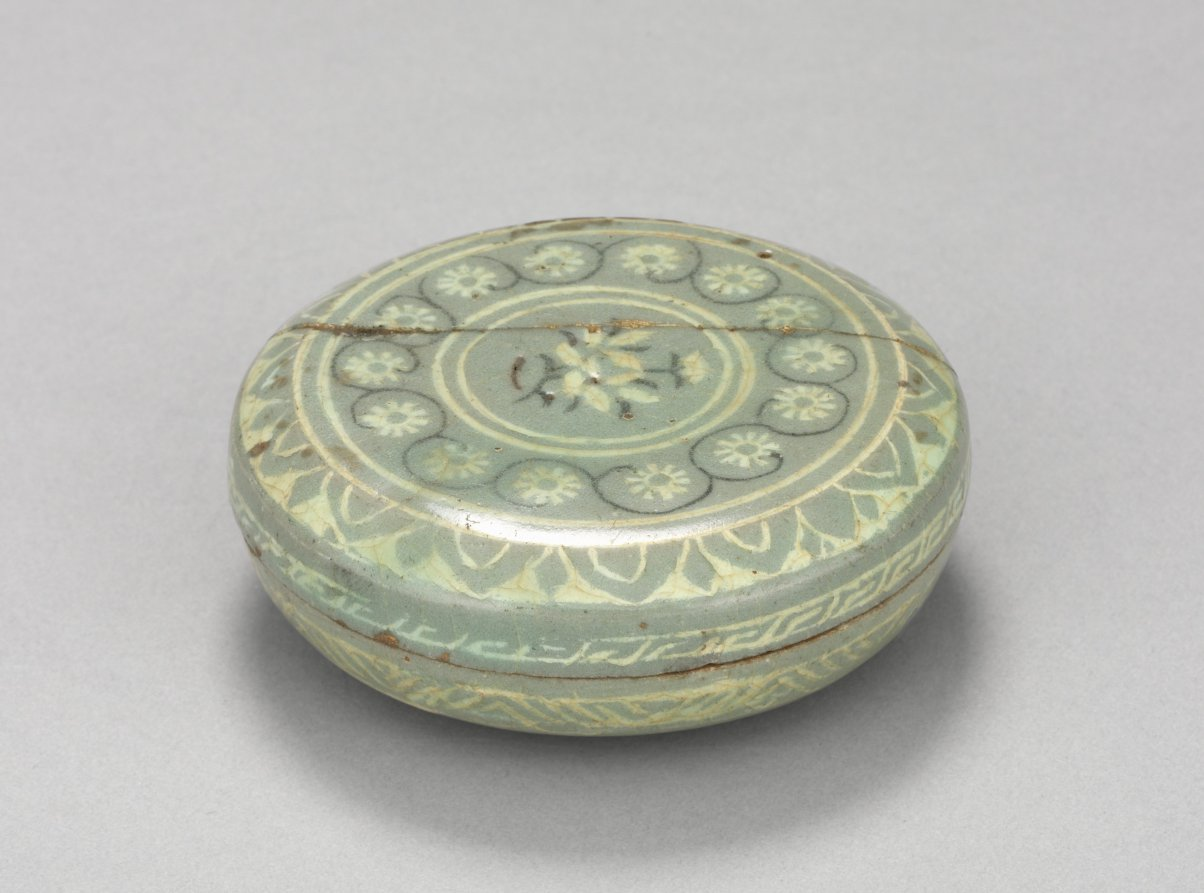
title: Box and Cover with Chrysanthemum and Scroll Design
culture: Korea, Goryeo dynasty (918–1392)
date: 1200s-1300s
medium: inlaid celadon ware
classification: Ceramic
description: Celadons, spoons, seals, and bronze mirrors were the most common burial objects in tombs during the Goryeo period (918–1392). Once used to contain colored powder, rouge, and eyebrow gel for makeup, this small container was one of the standard goods that furnished elites' tombs. Both women and men used the grain powder of rice or millet for whitening their skin, safflower extract for rouge, and plant ash or soot for eyebrow gel. Yet, natural-looking makeup seems to have been the most favorable one in Korea according to the travelogue by Xu Jing (1091–1153), the Chinese diplomat who visited Korea in 1123.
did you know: This ceramic container was used to store either incense or cosmetics.